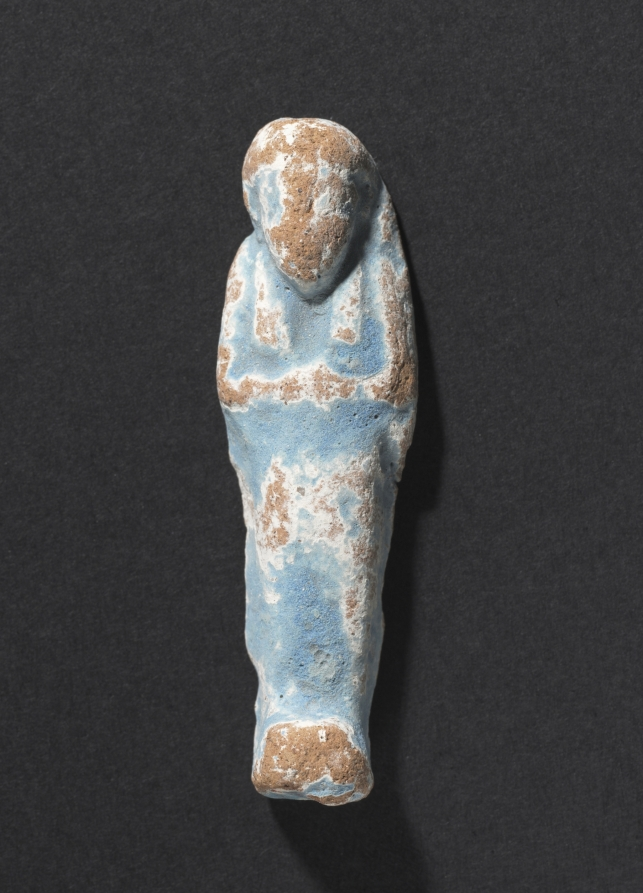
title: Shawabty of Ditamenpaankh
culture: Egypt, Late period (715–332 BCE), Dynasty 25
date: 715–656 BCE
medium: terracotta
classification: Funerary Equipment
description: High demand for shawabtys in the Late Period, a time when as many as 400 or more shawabtys were placed in the tomb with the deceased, gave rise to a specialized container for storing them: the shawabty box. This example is inscribed for the lady of the house, Ditamenpaankh, and was probably one of a pair originally made for her. The single-masted boat on the box's lid is perhaps an allusion to the pilgrimage of the deceased to the holy city of Abydos, the cult city of Osiris, king of the dead. The shawabtys inside are crude, mass-produced examples cast in an open mold. Made of terracotta, their blue paint imitates more costly shawabtys made of faience. As for the shawabty spell, it has been removed from its traditional location on the shawabty's front and relocated onto the sides of box, where it needed only to be written once, thus expediting production.